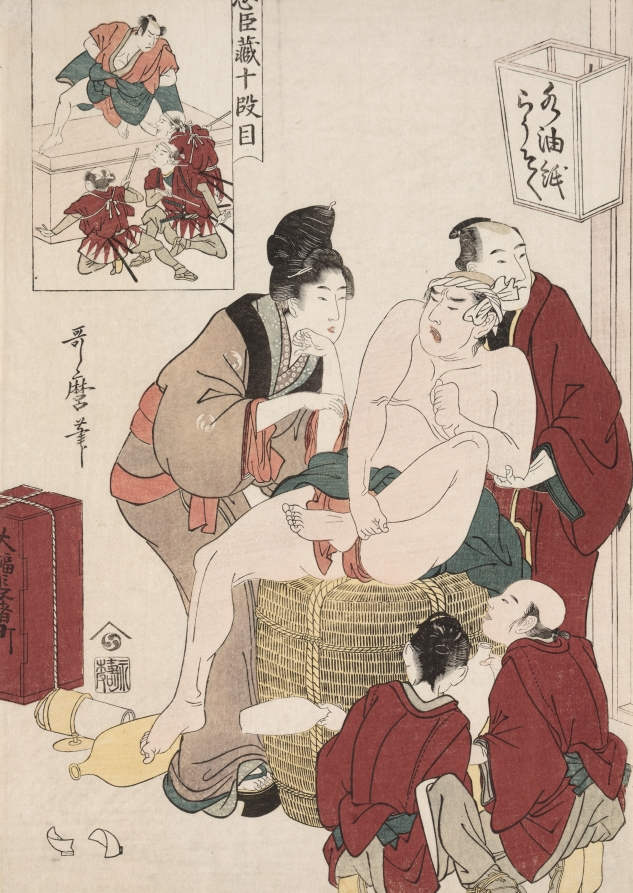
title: Chushingura: Act X of The Storehouse of Loyalty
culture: Japan, Edo period (1615–1868)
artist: Kitagawa Utamaro (Japanese, c. 1754–1806)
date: late 1790s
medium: color woodblock print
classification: Print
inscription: Artist's signature: Utamaro hitsu.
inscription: Publisher: Nishimuraya Yohachi (Eiju han, emblem).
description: Stage version: The hero Gohei bravely plants himself on a chest of armor and weapons to prevent government officials from discovering them before they are smuggled out of the house. He holds off the officials by claiming that the chest contains personal belongings of the lady of the house. Exposing these items would bring her humiliation and dishonor. See Chushingura: Perspective Picture for the "Treasure House of Loyalty" (CMA 1985.338.10). Parody print: Utamaro converted this moment of lofty bravery into one of humor. A drunkard guards a cask of sake to prevent the maid from opening it.